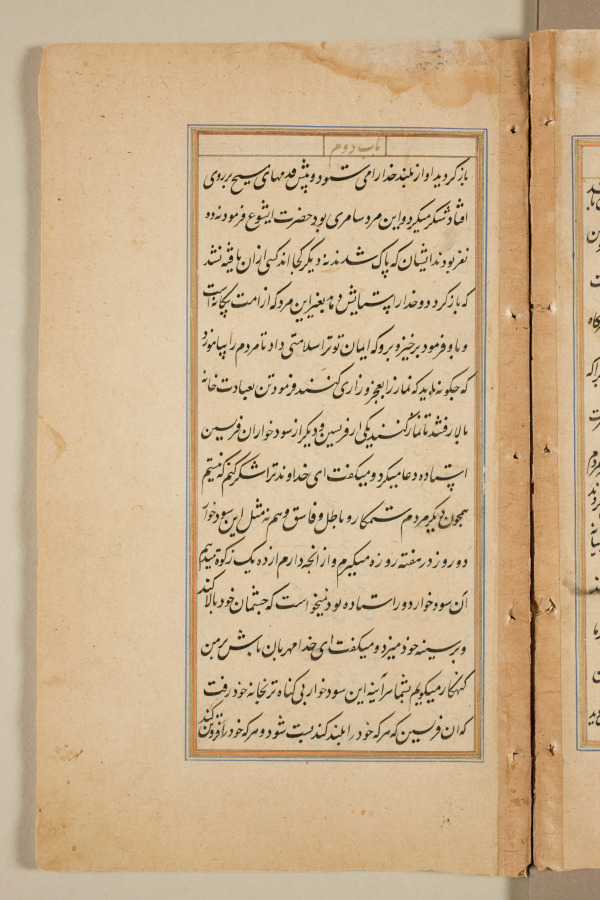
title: Text page from a Mirror of Holiness (Mir’at al-quds) of Father Jerome Xavier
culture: Mughal India, Allahabad, made for Prince Salim (1569–1627)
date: 1602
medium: Ink and gold on paper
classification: Manuscript